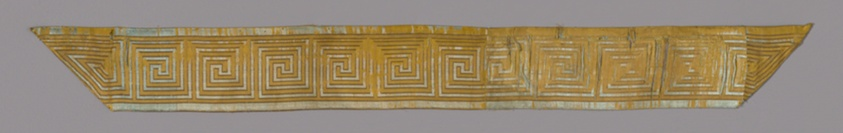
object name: Religious/Ritual Object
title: Section of Border from Thanka (Religious Picture)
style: qing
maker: Manchu (China)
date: 18th century, Qing dynasty (1644–1911)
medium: Silk, warp-float faced 2:1 's' twill weave with plain interlacings of secondary binding warps and supplementary patterning wefts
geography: China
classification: textile; weaving; ritual objects